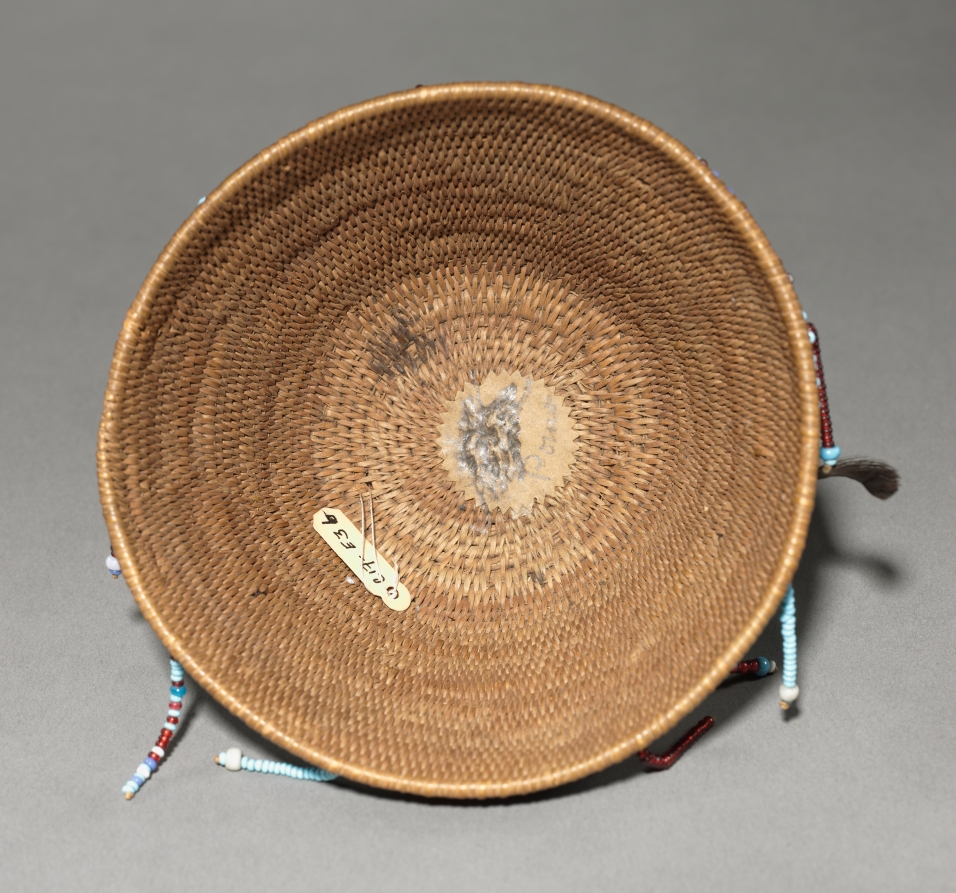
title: Conical Beaded Basket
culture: California, Wappo, Alexander Valley, Late 19th- Early 20th century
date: c. 1875–1925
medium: glass beads and feather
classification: Basketry